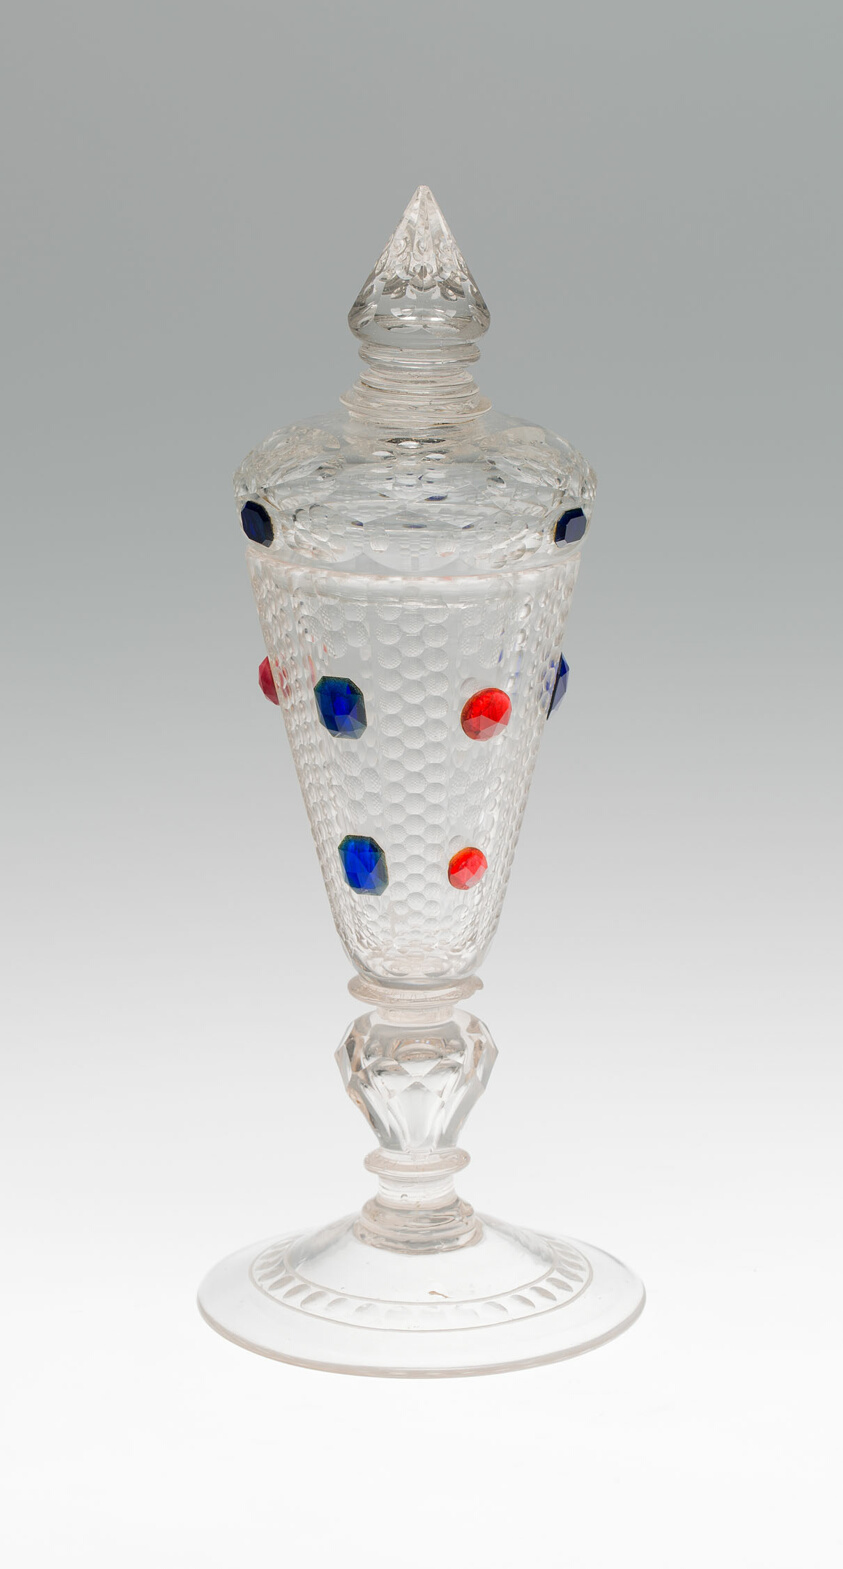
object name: Glass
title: Goblet with Cover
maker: Bohemia, Czech Republic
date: c. 1710/20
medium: Glass; blown, cut, and molded with applied glass stones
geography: Bohemia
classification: drinking vessel; glass; european decorative arts